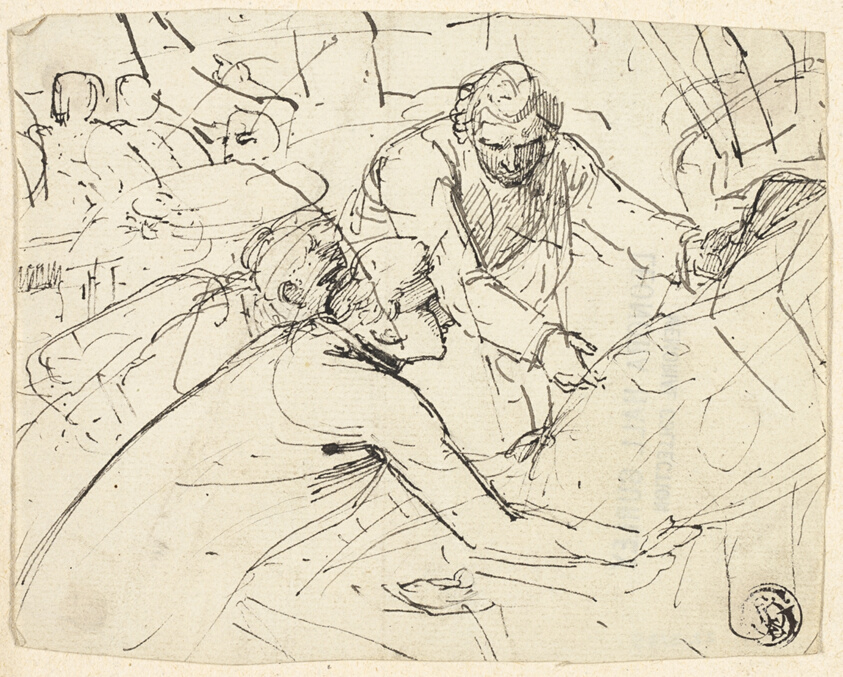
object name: Drawing and Watercolor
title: The Death of General Wolfe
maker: Attributed to Benjamin West; American, 1738-1820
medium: Pen and black ink on ivory laid paper, tipped onto ivory wove paper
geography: United States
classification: pen and ink drawings; drawings (visual works); prints and drawing